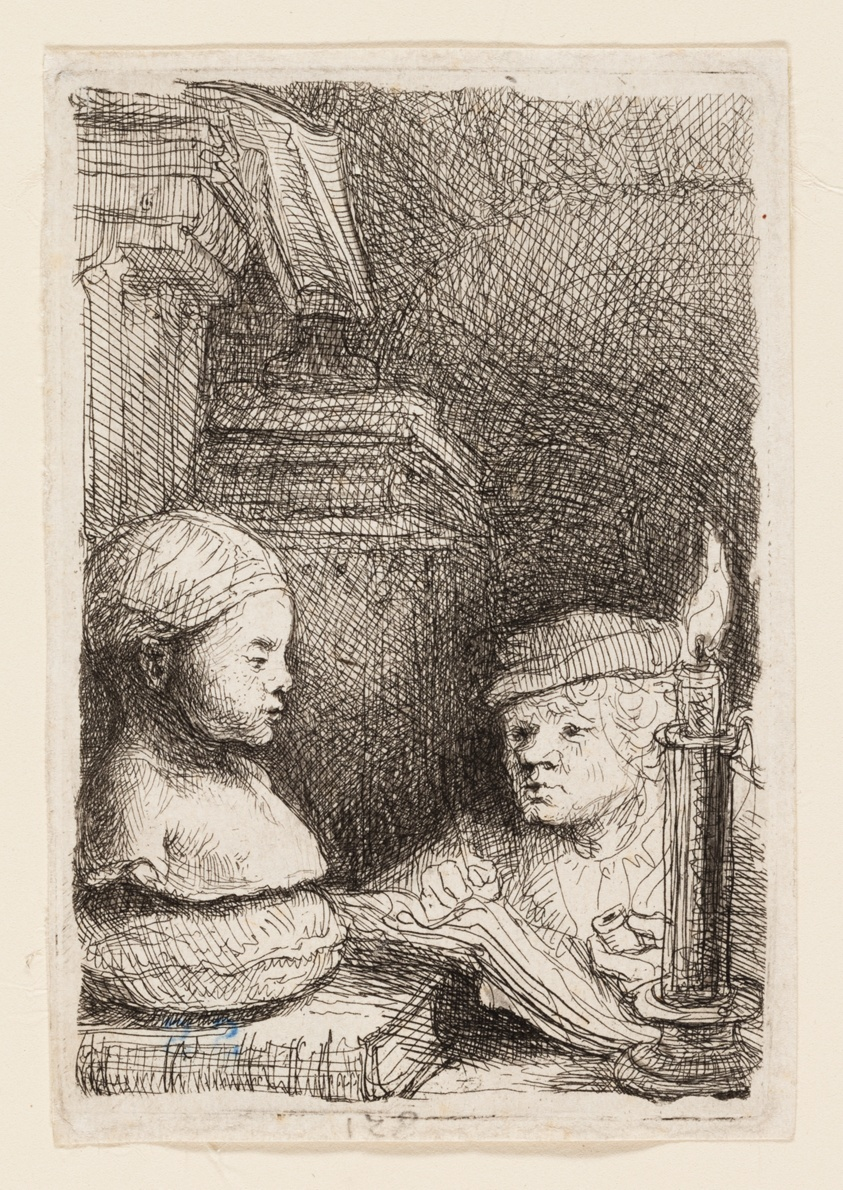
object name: Print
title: Man Drawing from a Cast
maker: Rembrandt van Rijn (Dutch, 1606-1669)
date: c. 1641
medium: Etching on ivory laid paper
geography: Holland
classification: etching; print; prints and drawing; paper